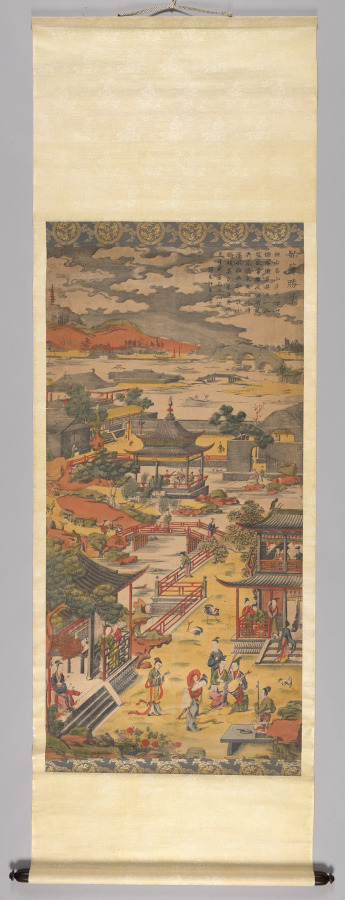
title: Scenic View of Suzhou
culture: China, Qing dynasty (1644–1911), Qianlong reign (1736–95)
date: 1736–95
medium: Hanging scroll; polychrome woodblock print; ink and color on paper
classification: Print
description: In the 1600s, printing flourished in such Jiangnan cities as Nanjing, Suzhou, Hangzhou, and Huizhou, evolving from privately enjoyed illustrated books printed in color to more commercialized single-sheet color prints that were hung on walls and became part of the rich urban visual culture.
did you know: Woodblock printing in color reached a height in China in the 1600s to 1700s. The prints were executed by means of sets of separate blocks, each carved to print a different color.